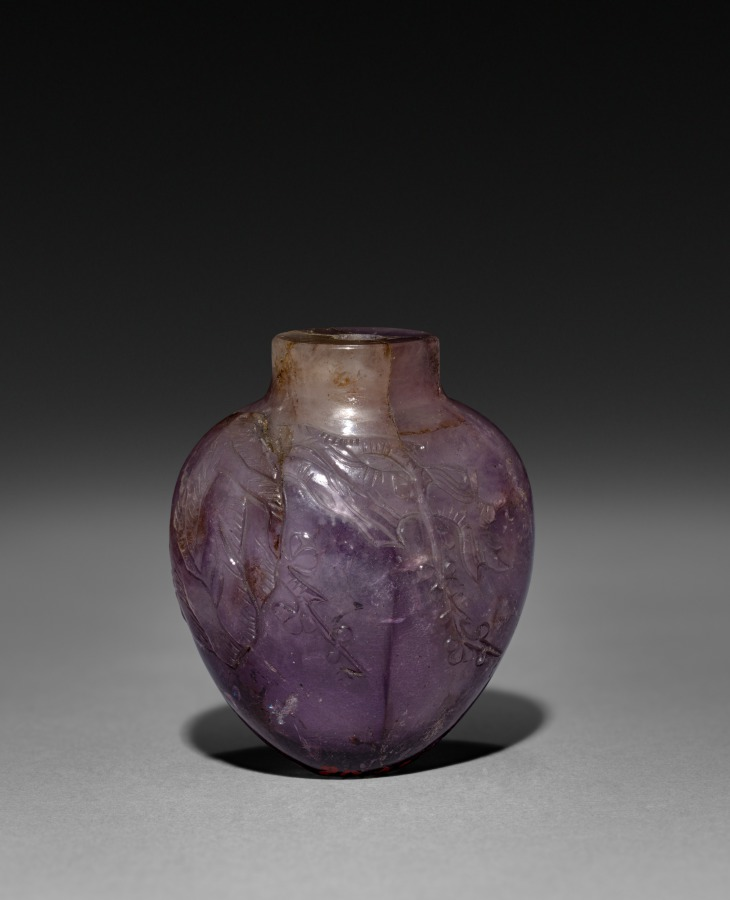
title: Snuff Bottle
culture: China, Qing dynasty (1644-1911)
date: 1644–1911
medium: glass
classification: Glass